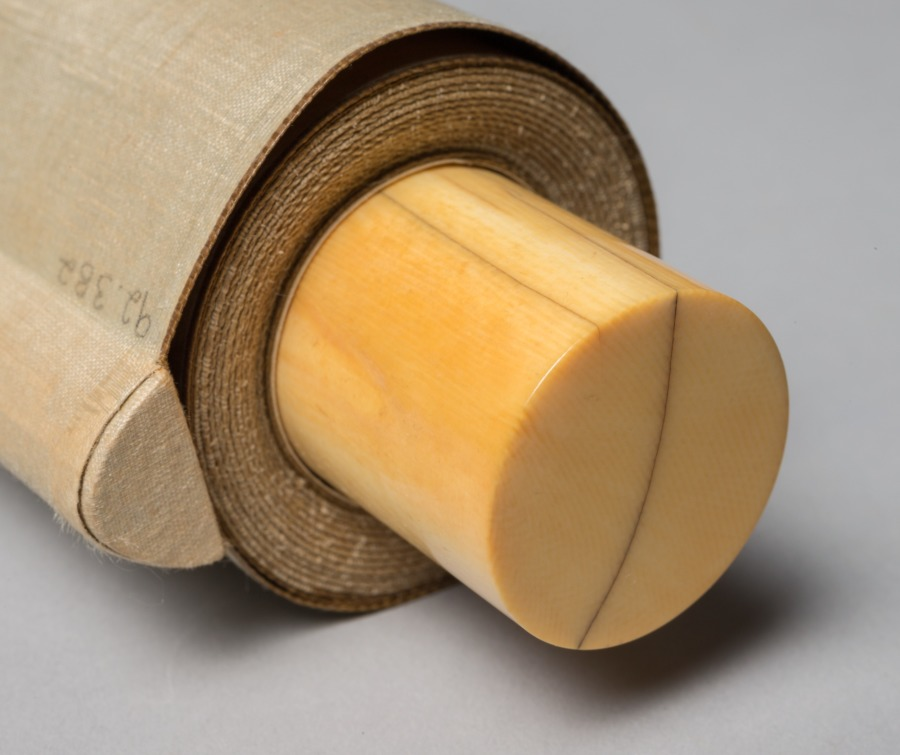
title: Puppy with Dandelions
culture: Japan, Edo period (1615–1868)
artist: studio of Tawaraya Sōtatsu (Japanese, c. 1570–c. 1640)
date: 1600–1640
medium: hanging scroll; ink on paper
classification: Painting